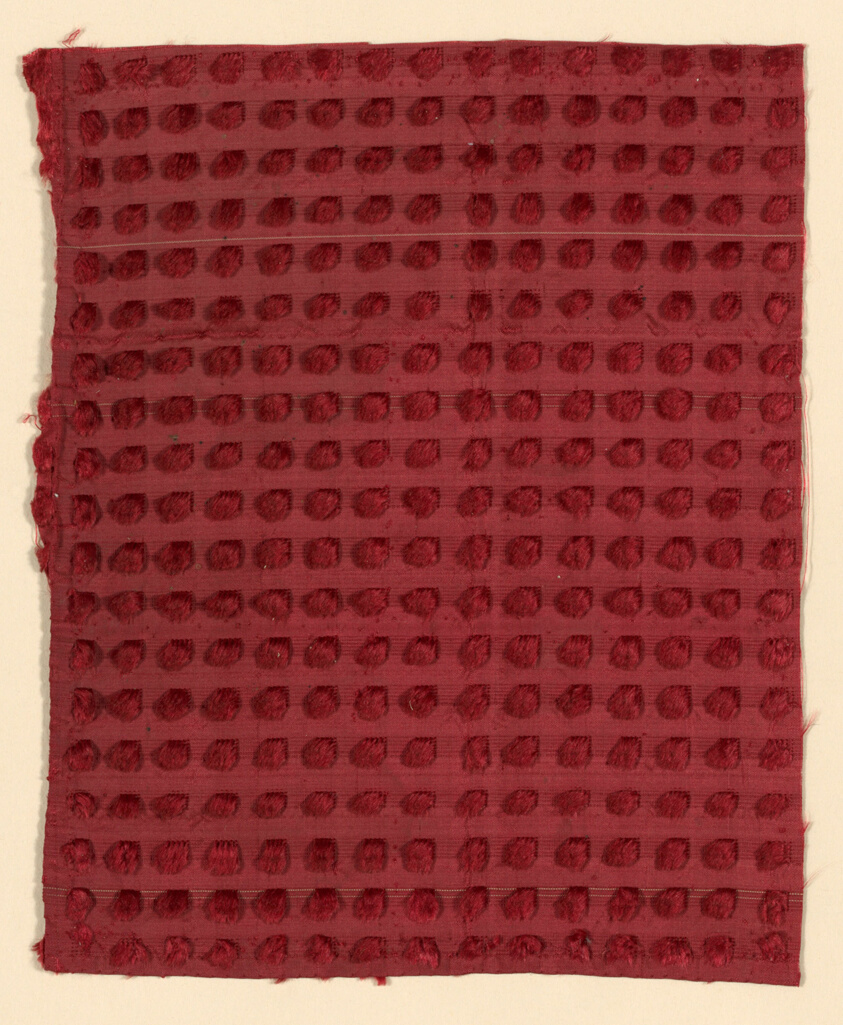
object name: Textile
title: Fragment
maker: Italy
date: 1775/1800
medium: Silk; velvet: cut, voided; against plain weave foundation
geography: Italy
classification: textile; weaving - velvet; weaving